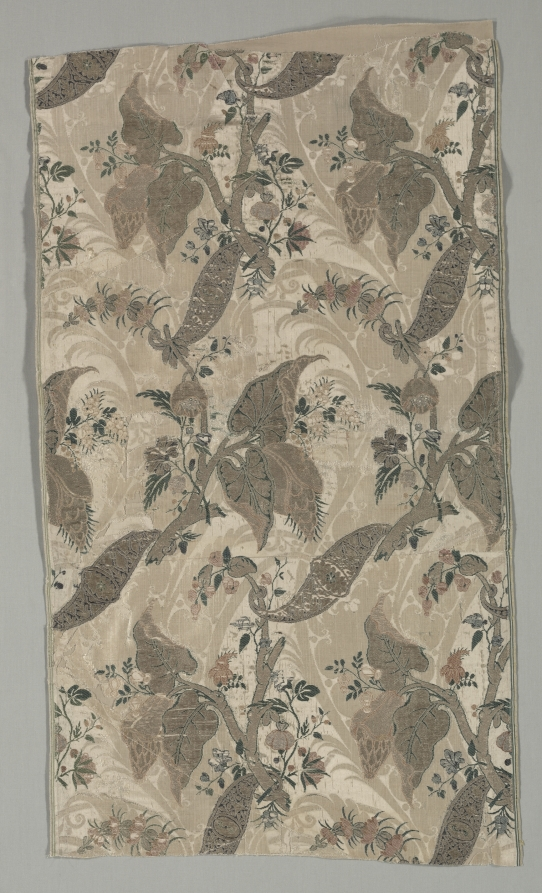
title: Length of Textile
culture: France, first quarter 18th century (late Baroque)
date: 1700–1725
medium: satin damask, brocaded; silk, silver and gold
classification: Textile